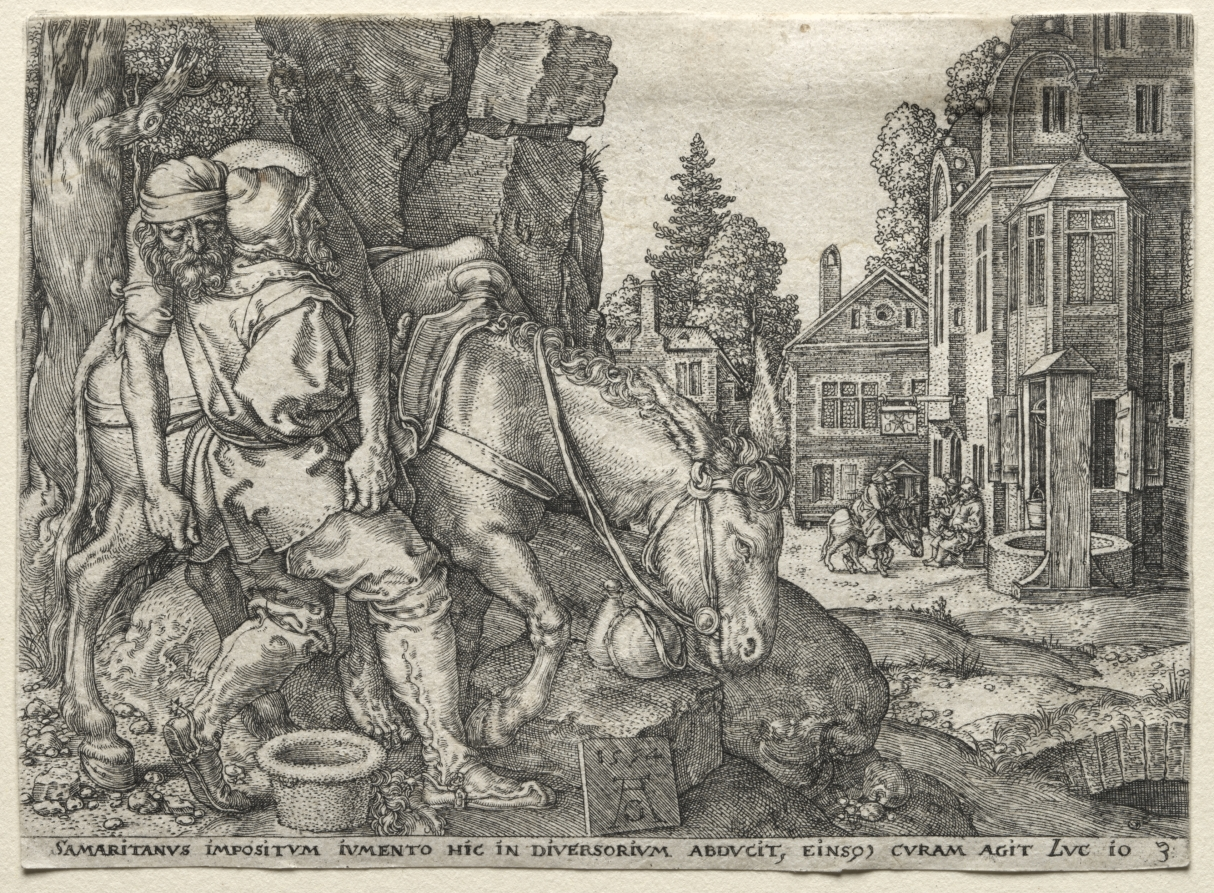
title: The Parable of the Good Samaritan: The Good Samaritan Putting the Traveler on His Donkey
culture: Germany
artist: Heinrich Aldegrever (German, 1502–1555/61)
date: 1554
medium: engraving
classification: Print